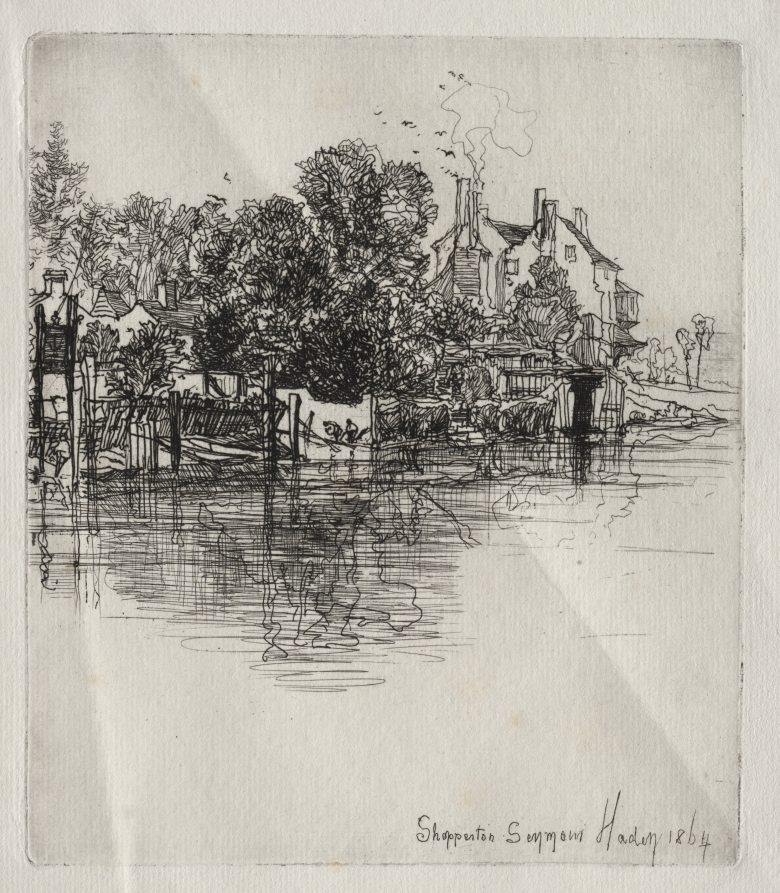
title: Shepperton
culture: England, 19th century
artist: Francis Seymour Haden (British, 1818–1910)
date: 1864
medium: etching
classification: Print